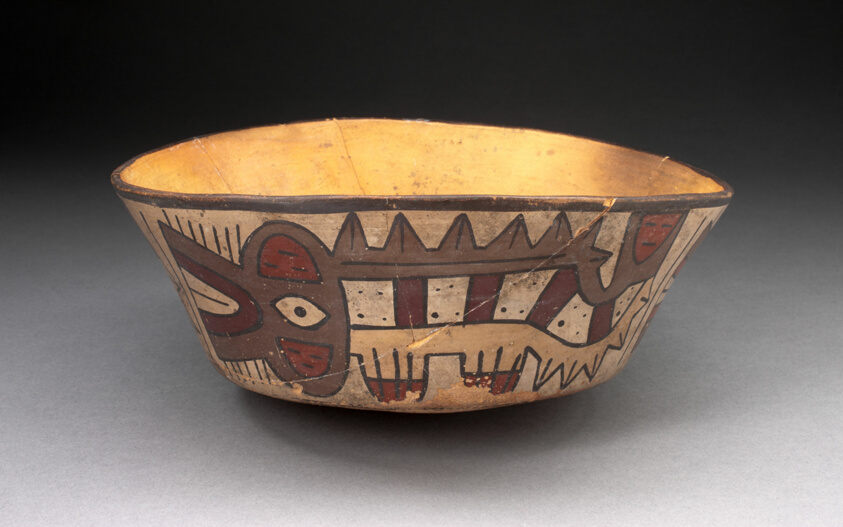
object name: Vessel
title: Flaring Bowl Depicting Abstract Killer Whales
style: nazca, early intermediate period, Pre-Columbian, americas, Arts of the Americas, andean, andes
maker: Nazca; South coast, Peru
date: 180 BCE–500 CE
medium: Ceramic and pigment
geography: Peru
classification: bowl; earthenware; ceramics; vessel; art of the americas